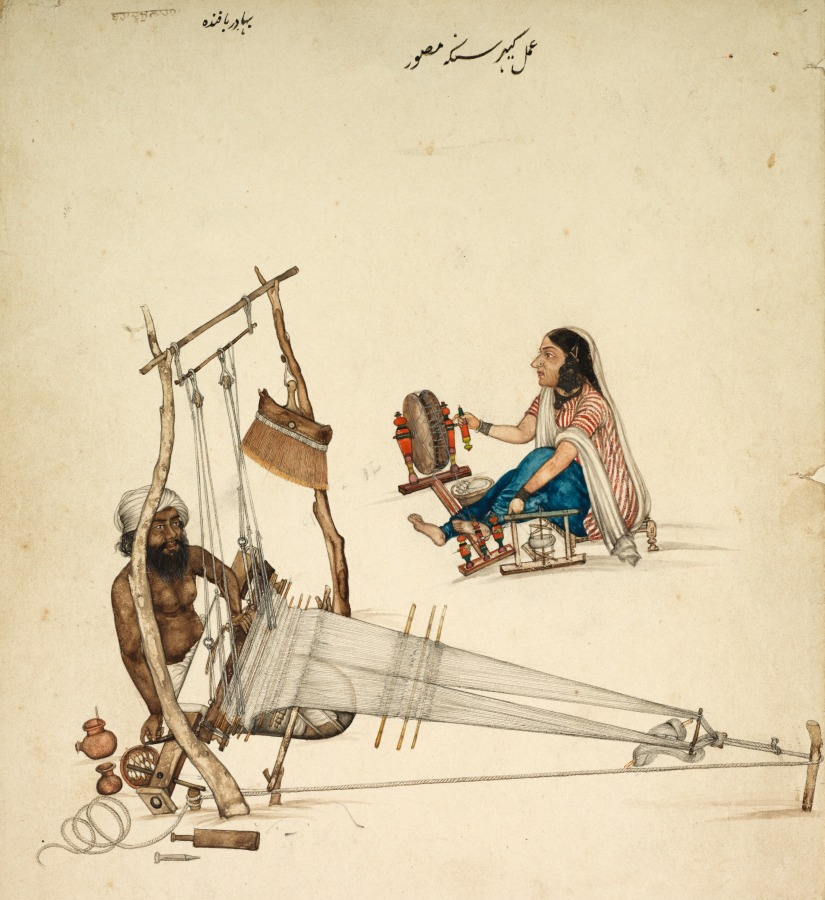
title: Weaving and Spinning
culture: India, Punjab, probably Amritsar or Lahore, Company school, 19th century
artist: Kehar Singh (Indian)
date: c. 1860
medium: Gum tempera and ink on paper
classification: Painting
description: Hand-spun and woven cotton cloth was probably the most important commodity exported from India during the 1700s and 1800s. The British East India Company expanded to manage the business of textile production and international sale. The humble conditions under which Indian weavers and spinners worked are depicted here, where simple looms are made from crude branches, and the craftsmen work on the ground. The inscriptions at the top of the page indicate the artist’s name and the workers’ occupations.